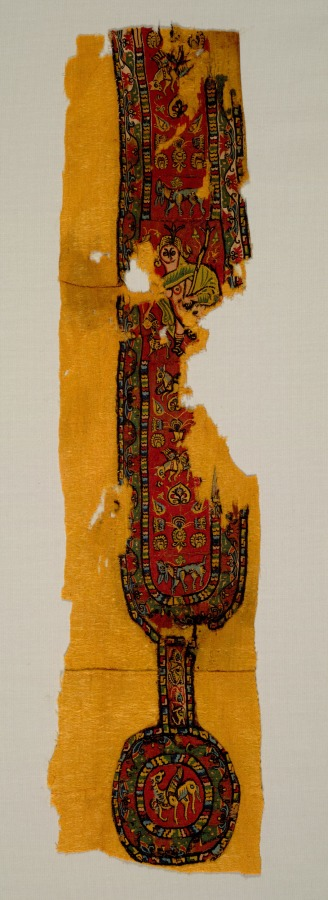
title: Clavi (Decorative Band)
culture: Egypt, Umayyad period (661–750) or Abbasid period (750–1258)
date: 700s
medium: wool; plain weave with slit-tapestry weave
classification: Textile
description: Figures and winged animals from ancient Greece and Rome remained popular during the early Islamic period of the Umayyad and Abbasid dynasties. The naked figure could represent Dionysus, the Greek god of wine; he holds his thyrsus, a staff decorated with ivy leaves and pinecones, while pouring liquid from a small jug for the panther. These colorful designs probably adorned the sleeve and front or back of a tunic, a garment worn directly on the body for over 1,000 years, from Roman antiquity to the Middle Ages. Popular decorations were regularly reused and sewn onto new tunics, as can be seen on this winter garment made of wool.